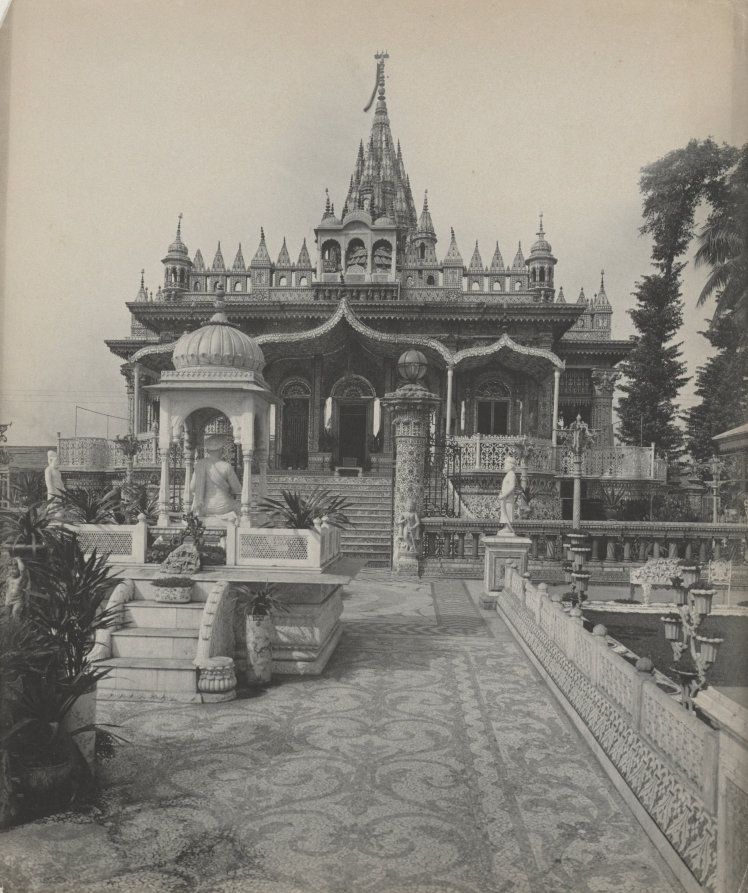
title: Jain Temple, Calcutta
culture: Ceylon, now Sri Lanka, 19th century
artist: A. W. A. Plâté Studio (Ceylonese)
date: c. 1890s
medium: platinum print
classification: Photograph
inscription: Written in pencil on verso: "1277 75.-/ GE 93 (?) L0854.39 1211/2 Calcutta-Jain Temple"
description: With the rise of Calcutta (now Kolkata) as an urban center in the 1800s, a jeweler named Rai Badridas Bahadur Mookim (1833–1913) relocated there from the northern Indian city of Lucknow, along with many other Jain merchants. He ordered the construction of this temple, studded with colored glass, dedicated to the 23rd Jina Parshva. It was completed in 1867. His portrait sculpture is seen from behind in the forecourt, under the domed pavilion. The annual festival of Paryushan is celebrated at this temple, where manuscripts—especially of the Kalpa-sutra—are displayed, carried in processions, and read aloud to the congregation.